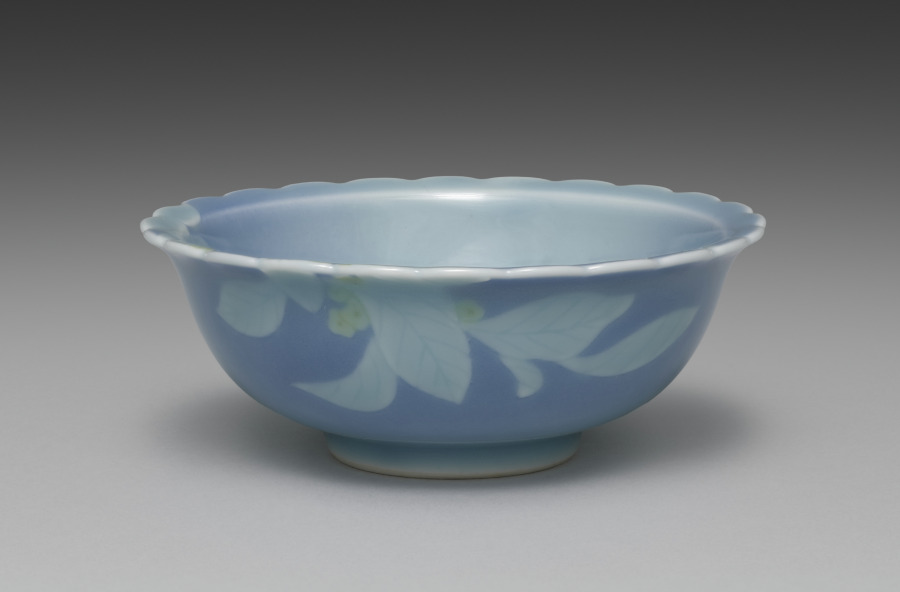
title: Dish from Dishes with Flowers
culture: Japan, Taishō period (1912–26) or Shōwa period (1926–89)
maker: Seifū Yohei IV (Japanese, 1872–1951)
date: 1914–46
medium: One from a set of five dishes; porcelain with underglaze yellow and blue glaze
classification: Ceramic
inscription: 清風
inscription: 清風造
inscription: 成山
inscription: 清風盧人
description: One can imagine a cool summer breeze when looking at this set of dishes, each shaped with a crenulated mouth and glazed with blue. Around the rim and into the basin, the bowls have low-relief designs of flowers with underglaze yellow petals; their leaves and stems show white through the glaze. On each dish, the design continues over the rim onto one side.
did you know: Seifū Yohei IV’s dishes with flowers feature underglaze yellow.